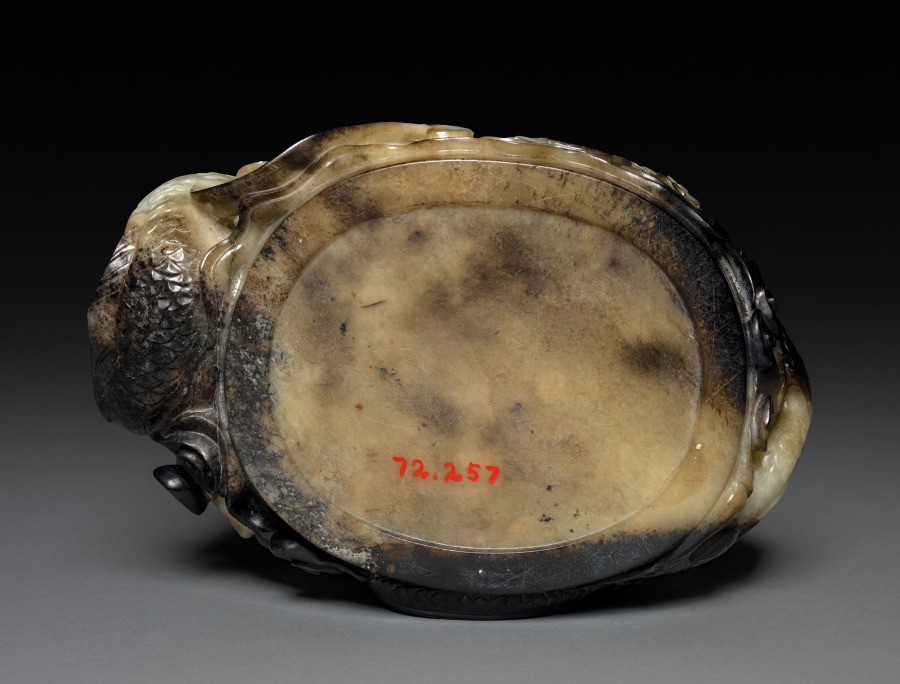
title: Dish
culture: China, Ming dynasty (1368–1644)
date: 1368– 1644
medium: jade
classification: Jade